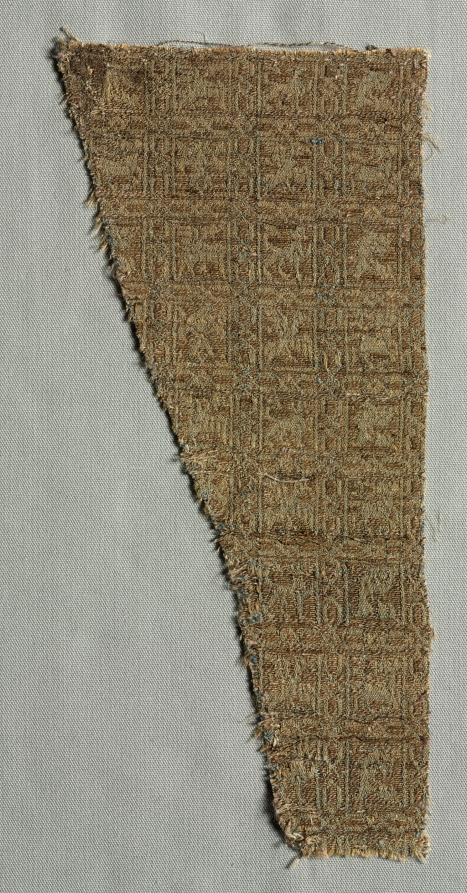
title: Lampas with animals in squares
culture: probably Iran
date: late 1200s - 1300s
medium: lampas and taqueté: silk and metal thread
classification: Textile